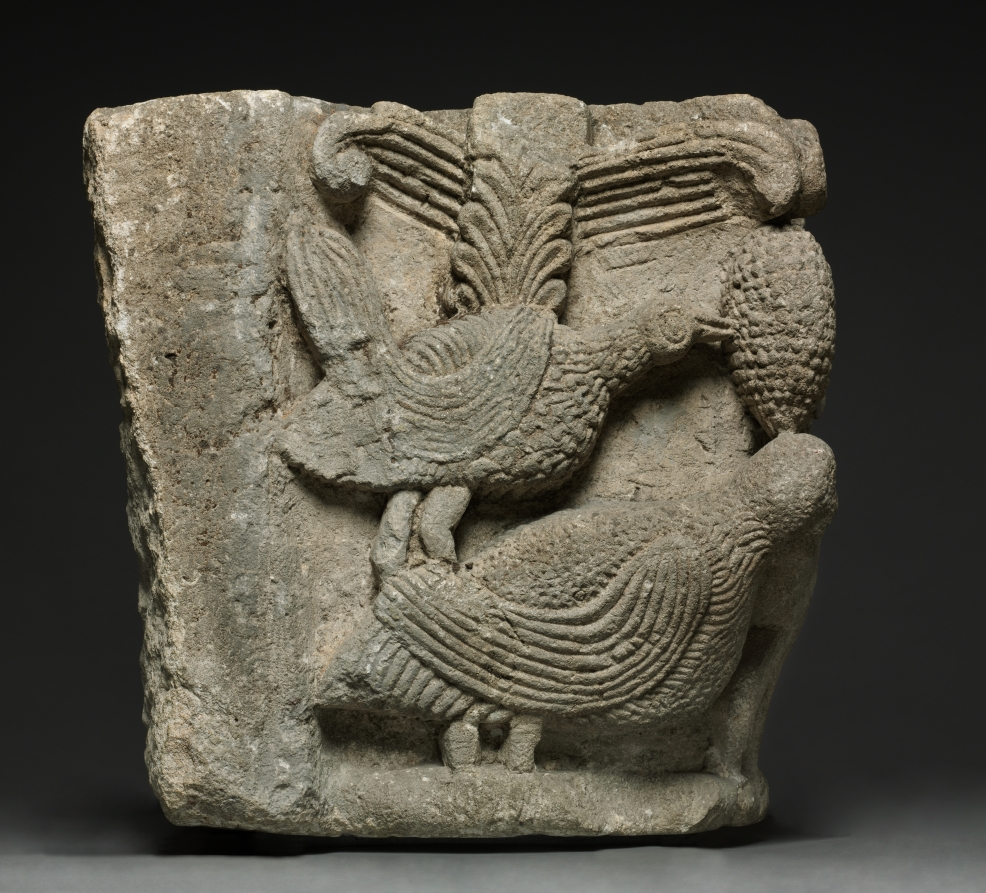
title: Engaged Capital with a Fantastic Creature and Three Birds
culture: Western France, Bordelais, early 12th century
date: early 1100s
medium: limestone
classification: Sculpture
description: The closest parallels for the dramatic, heavy style of this capital appear in the capitals of the porch of Saint-Seurin in Bordeaux.